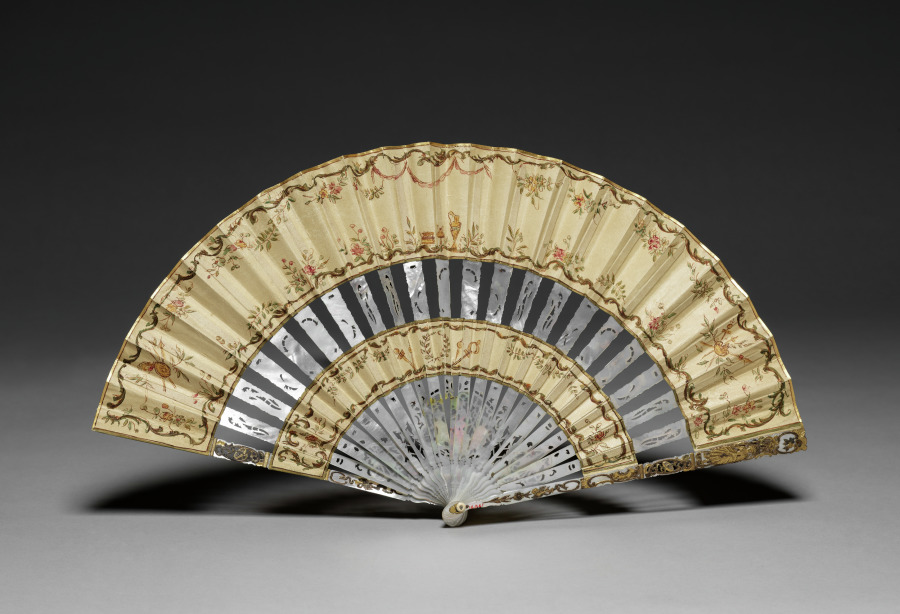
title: Fan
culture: France, 18th century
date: c. 1750–1760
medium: mother-of-pearl, painted paper (?), gold and silver leaf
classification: Miscellaneous